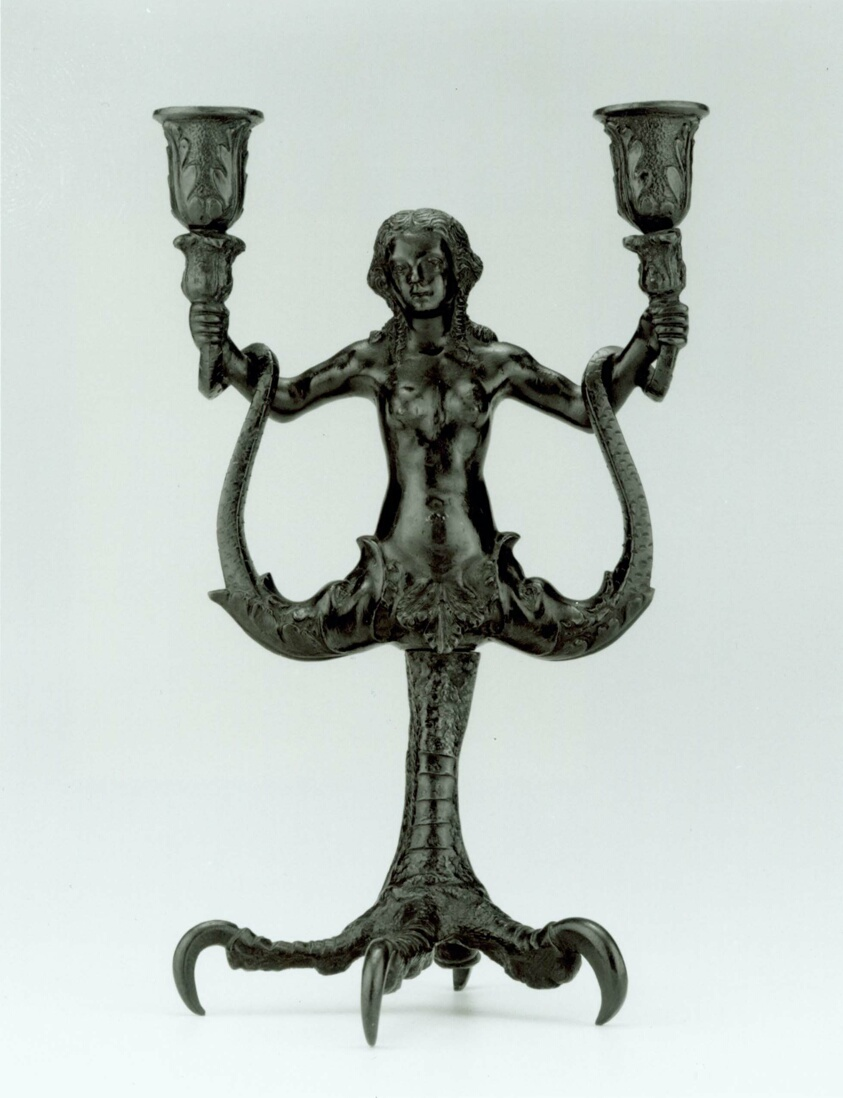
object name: Decorative Arts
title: Candelabrum in the Shape of a Siren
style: sixteenth century, 16th Century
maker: Workshop of Severo da Ravenna (Severo di Domenico Calzetta; Italian, active c. 1496–c. 1543)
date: c. 1520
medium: Bronze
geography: Venice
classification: candleholder - candelabra; lighting device; furniture; european decorative arts; decorative arts; Italian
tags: sirens, furniture, candelabra, bird, cups, dolphins, leaf, leaves, mythical, mythological figures, nudes, woman